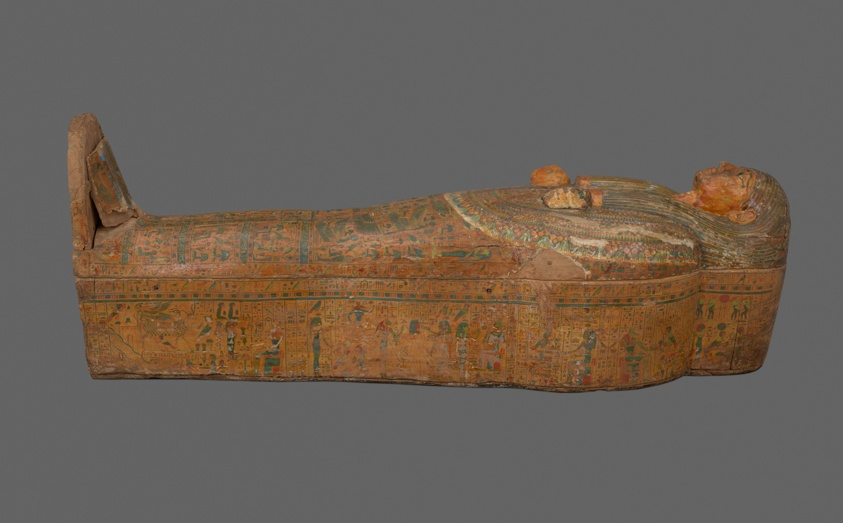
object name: Funerary Object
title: Coffin of Nespahertahat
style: twenty-first dynasty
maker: Egyptian; possibly Deir el-Bahri, Thebes (now Luxor), Egypt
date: Third Intermediate Period, Dynasty 21 (about 1069 –945 BCE)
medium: Wood and pigment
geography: Ancient Egypt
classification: coffin; ancient art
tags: funerary art